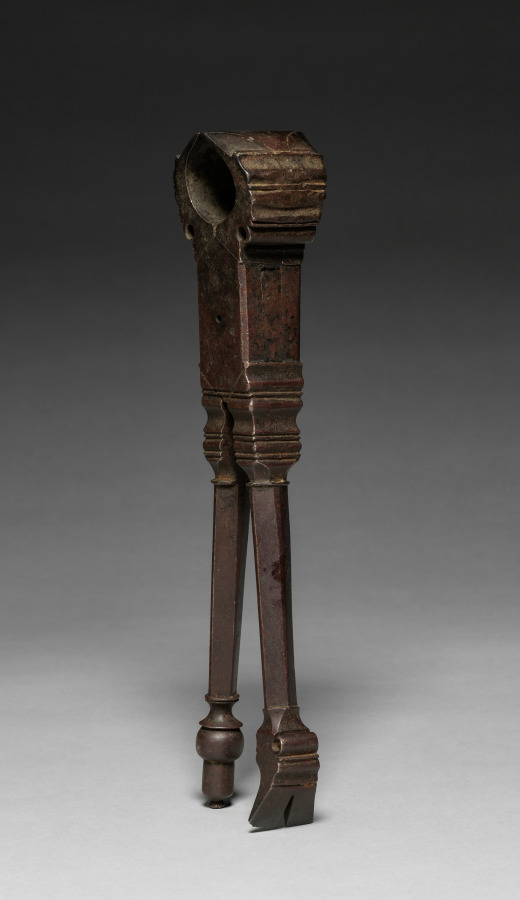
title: Pinchers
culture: Germany or France, 16th century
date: 1500s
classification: Tool